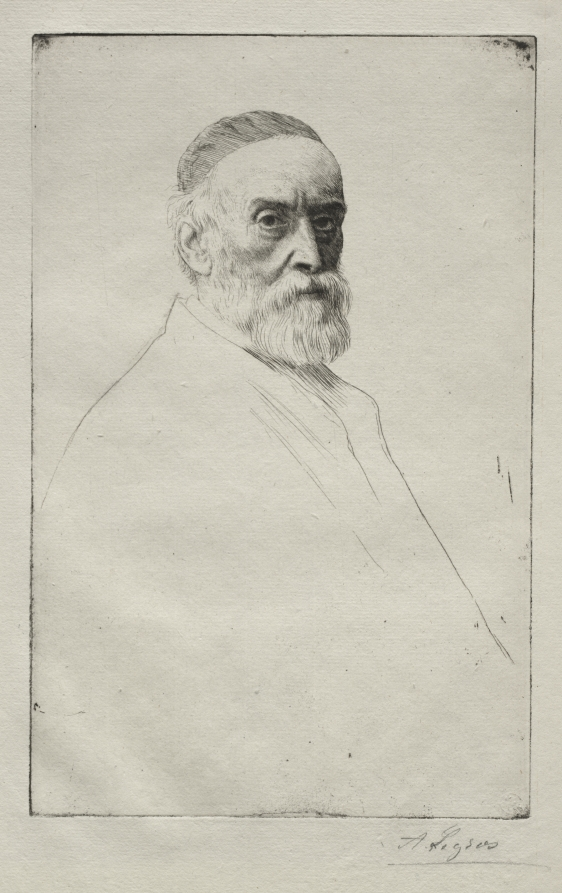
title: George Frederic Watts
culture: France, 19th-20th century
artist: Alphonse Legros (French, 1837–1911)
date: 1876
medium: drypoint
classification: Print